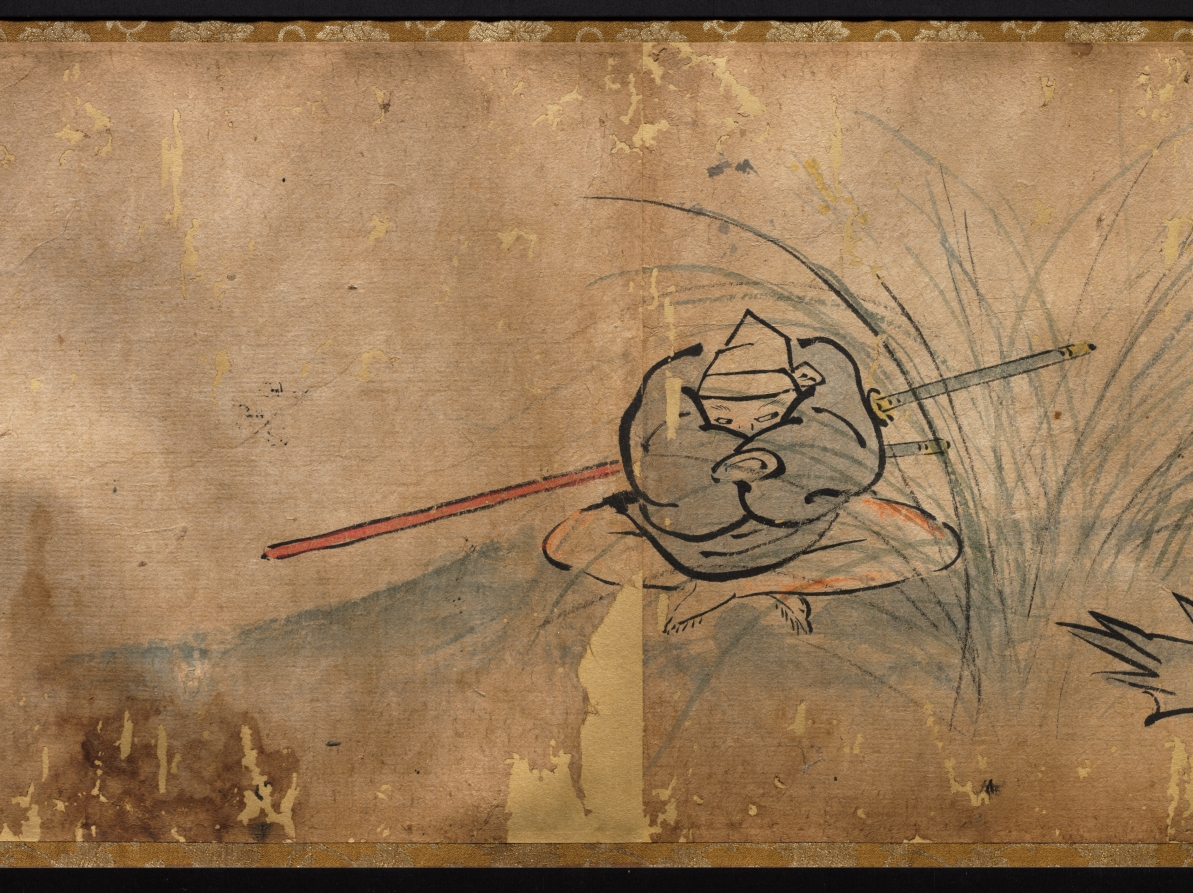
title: The Illustrated Tale of Oishi Hyōroku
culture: Japan, Edo period (1615–1868)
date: 1700s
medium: handscroll; ink and color on paper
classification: Painting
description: This incomplete handscroll illustrates part of the story of Oishi Hyoroku, a young man tasked with battling fox apparitions who were creating problems in his town. In other extant versions of the scroll, the story is set in the fall of 1624 in Kagoshima in southern Japan. Throughout the story, Hyoroku is tricked and terrified by the foxes that shift their shapes into a variety of monstrous phantoms. After repeated humiliations, he eventually captures two of the foxes. In this version, colloquial texts that function like text blurbs in comics appear throughout the scroll, but the main text is missing.